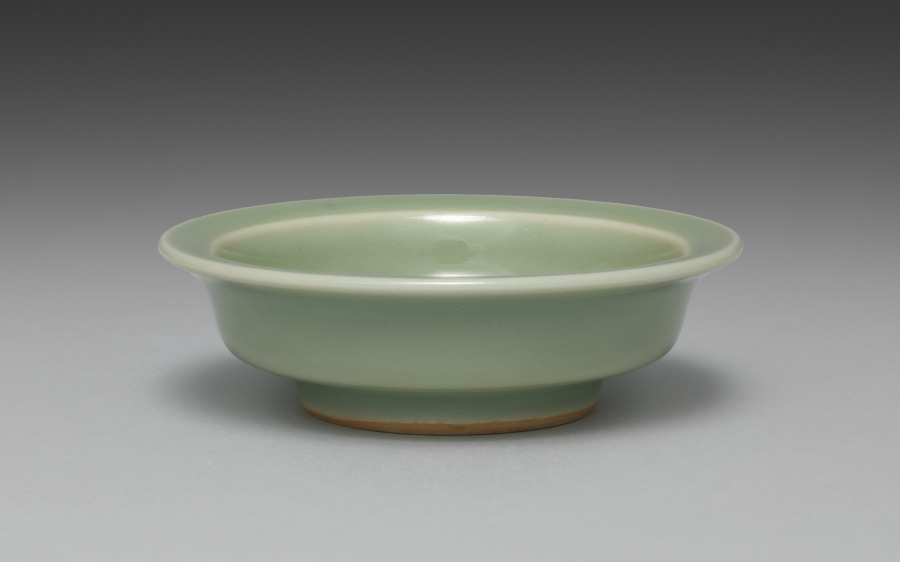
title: Saucer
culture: Japan, Meiji period (1868–1912)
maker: Seifū Yohei III (Japanese, 1851–1914)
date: 1893–1914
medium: One from a set of ten dishes; porcelain with green glaze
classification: Ceramic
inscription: 清風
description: Yohei III’s main output for his sophisticated clientele was in the form of tea sets and dining sets. He created a range of dishes in green glazes. He often produced in pairs, sets of five, or sets of ten. For this set of ten small dishes in a simple, round form that emphasizes the glaze above all, the box lid designates the piece as seiji, or green-glazed porcelain, using a general term for the extensive palette of green glazes often called celadon in English. The box lid further identifies the dishes themselves as tōchō, literally “bean-sized saucers,” a size that makes them suitable for dipping sauces.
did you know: The ten dishes in this set are stored in stacks of five in a two-compartment box.